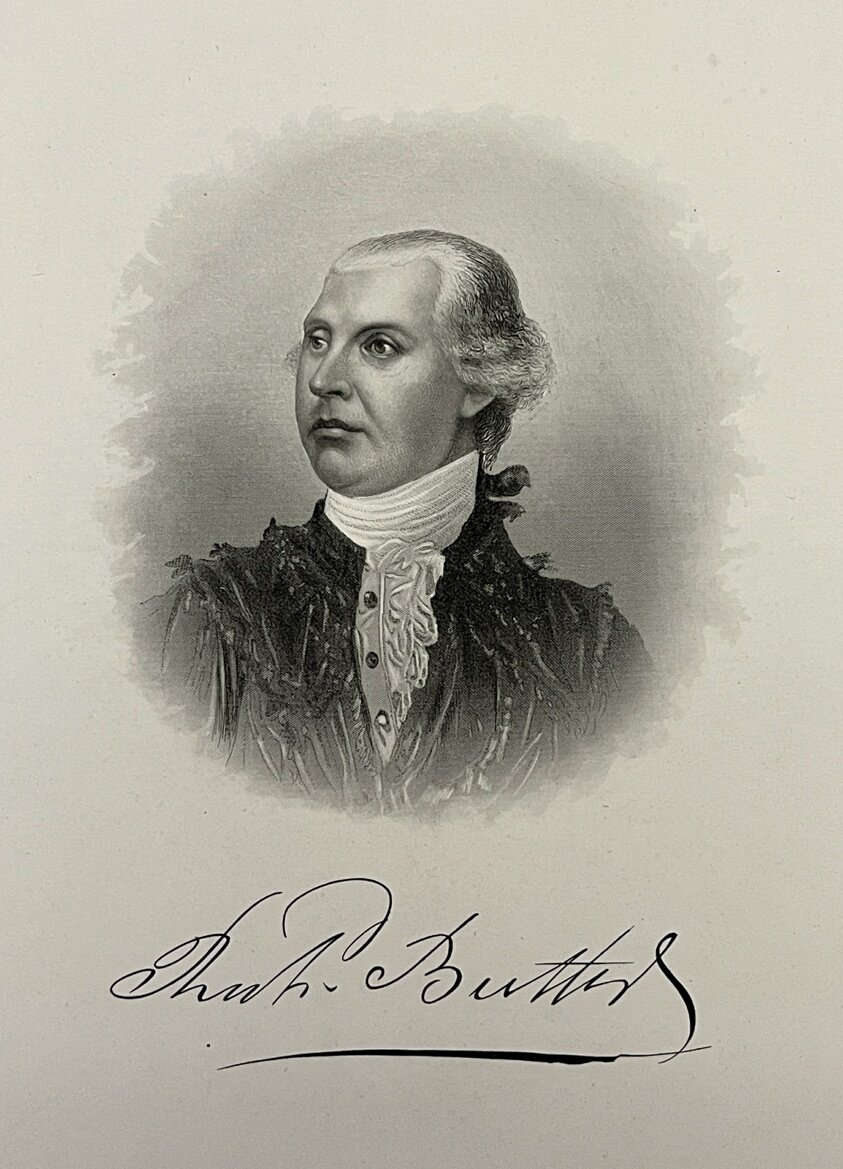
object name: Print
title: Thomas Buttters[?]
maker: Artist Unknown (Likely American, 19th century)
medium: Stipple engraving and etching on ivory paper, laid down on cream paper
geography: United States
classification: reproduction; print; prints and drawing